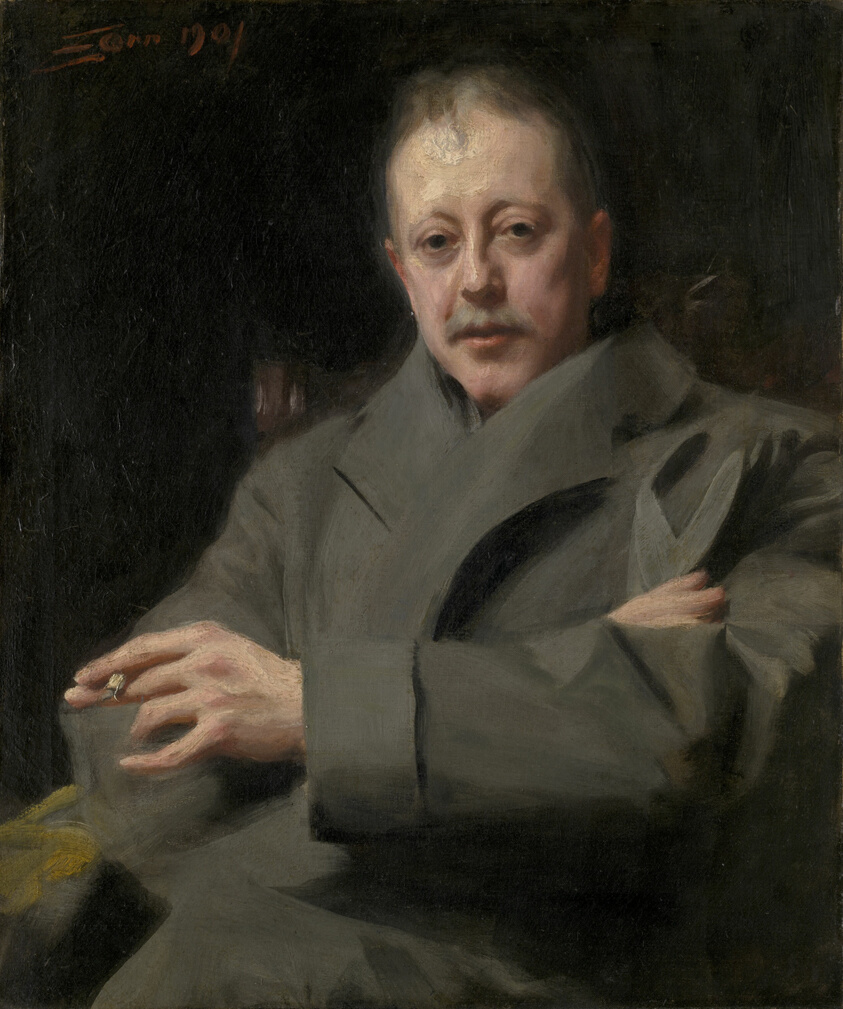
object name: Painting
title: Portrait Study of a Man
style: 20th Century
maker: Anders Leonard Zorn (Swedish, 1860–1920)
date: 1901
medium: Oil on canvas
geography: Sweden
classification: oil on canvas; portrait; paint; oil paintings (visual works); european painting; painting; modern and contemporary art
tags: portrait, portraits: male subject, portraits, man, smoking, smoke, jackets, gray (color)